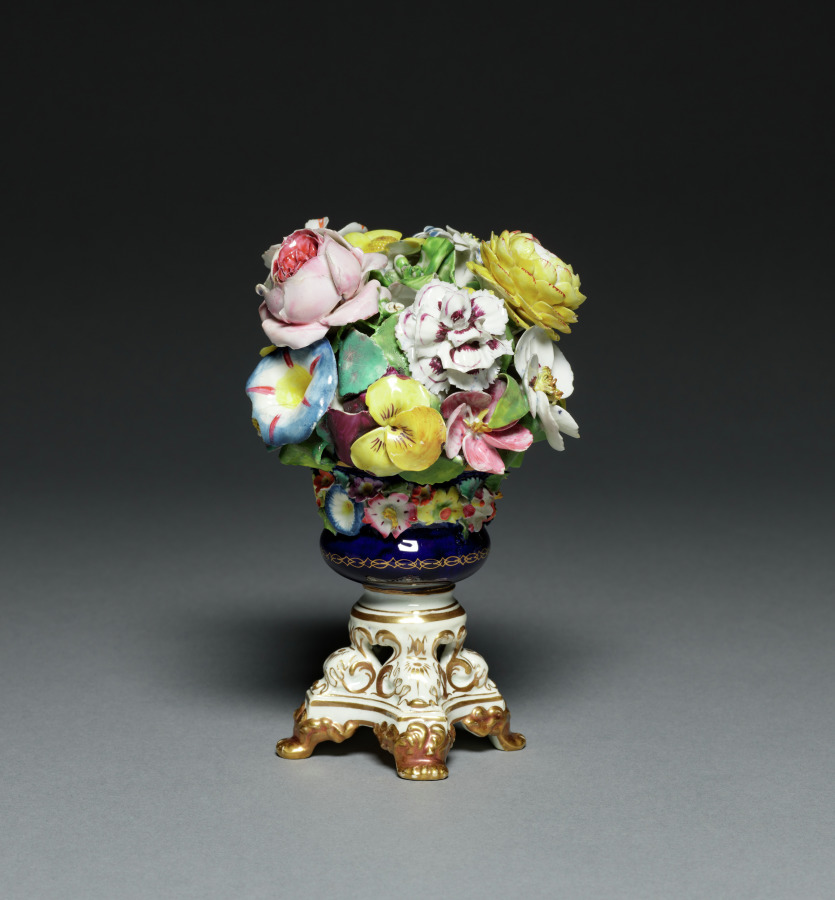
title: Flower Pot and Flowers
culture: England, Derby, 19th century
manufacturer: Derby Porcelain Factory (Bloor Period) (British)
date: 1811–1848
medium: artificial porcelain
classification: Ceramic